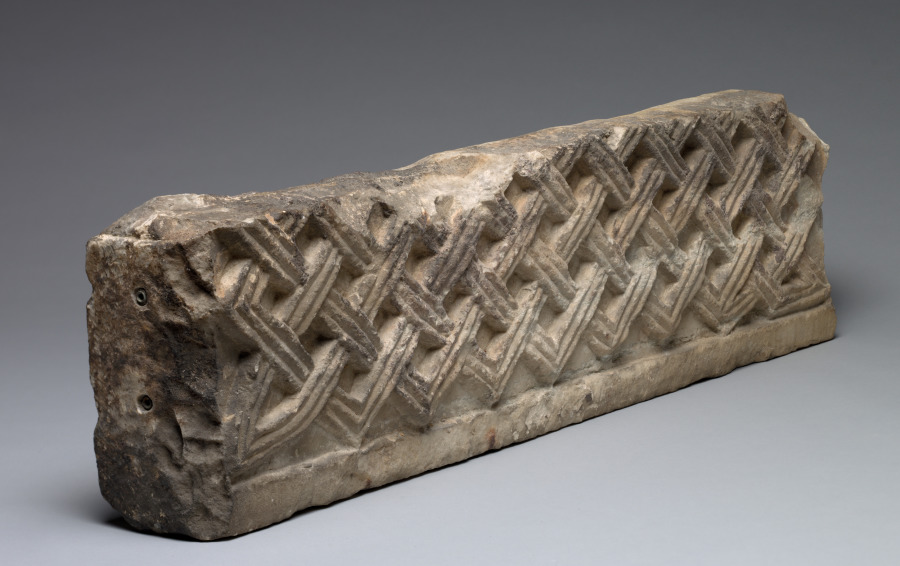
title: Fragment of a Panel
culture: Italy, Rome, Longobardic Style, Migration period, 8th-9th centuries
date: 700s-800s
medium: marble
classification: Sculpture